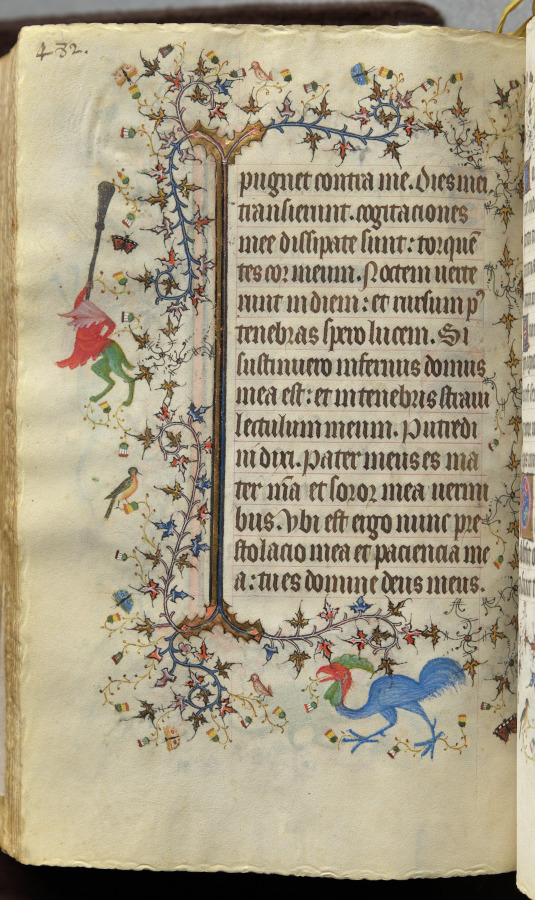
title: Hours of Charles the Noble, King of Navarre (1361-1425): fol. 235v, Text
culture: France, Paris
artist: Master of the Brussels Initials and Associates (French)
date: c. 1405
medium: ink, tempera, and gold on vellum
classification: Bound Volume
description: This precious volume was obviously highly prized by its owner, the French-born King of Navarre, who had his coat of arms painted on no less than twenty folios. Rather than directly commissioning this manuscript from a specific workshop, it seems that Charles the Noble acquired his book of hours -- perhaps ready-made for the luxury market -- while on a trip to Paris in 1404-05. A collaborative effort, six painting styles are evidenced within the pages of this codex, those of two Italians, two Frenchmen, and two Netherlanders. The painter who was responsible for the planning and decoration of the book, and who produced seventeen of the large miniatures, was a Bolognese artist known as the Master of the Brussels Initials. His principal assistant, responsible for most of the borders, was a Florentine who signed his name "Zecho" da Firenze on folio 208 verso.